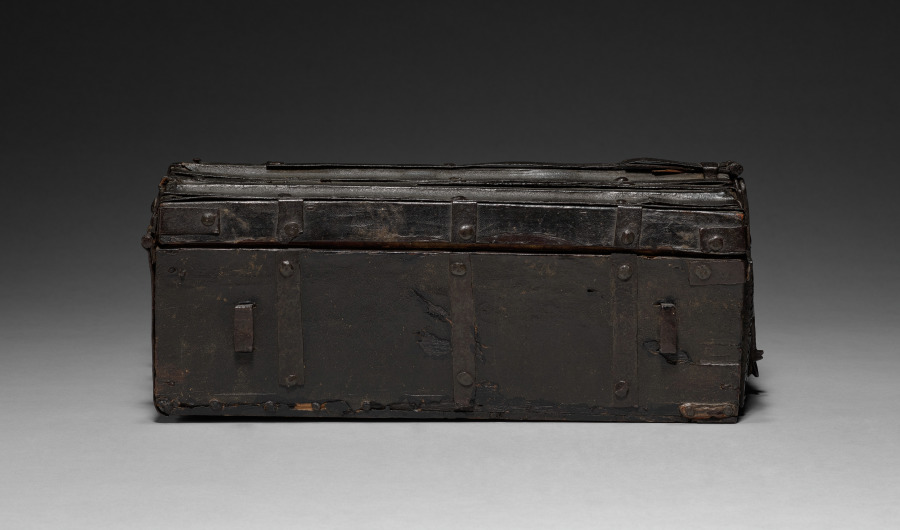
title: Coffret with Woodcut of Saint Veronica's Vernicle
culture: Coffret: France, probably Paris; Woodcut: Germany, Augsburg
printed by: Hans Burgkmair the Elder (German, 1473–1531)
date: Coffret: c. 1515; Woodcut: c. 1509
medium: Wood, leather, iron, textile, woodcut with stenciled coloring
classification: Print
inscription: SALVE. XPI. EFFIGIES. SACERRI[M]A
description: This remarkable object is thought to have functioned as a traveling case to keep small valuables and books, as well as a provisional altar. Made in France around 1515, the interior lid is affixed with a devotional woodcut made in Germany, imported, and colored for the purpose. Featuring an image of the veil of Saint Veronica, the text at the bottom of the woodcut guides the user in prayer to the holy image of Christ’s face which has been miraculously imprinted on the veil, an action that held promise of indulgences (a reduction in one’s punishment for sins). Presumably, the owner carried the box on a journey, retrieved a prayer book from inside, and propped it open in order to practice daily prayers.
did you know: A secret compartment on the top lid of this coffer may have held a relic, consecrated host, or valuable document.